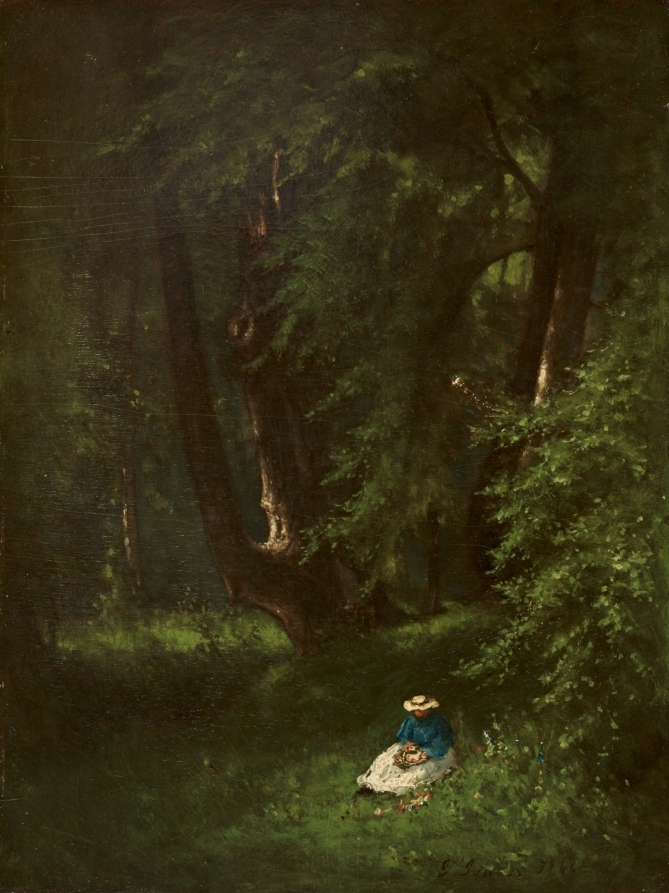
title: In the Woods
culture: America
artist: George Inness (American, 1825–1894)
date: 1866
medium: oil on board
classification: Painting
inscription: Signed lower right: "G. Inness 1866"